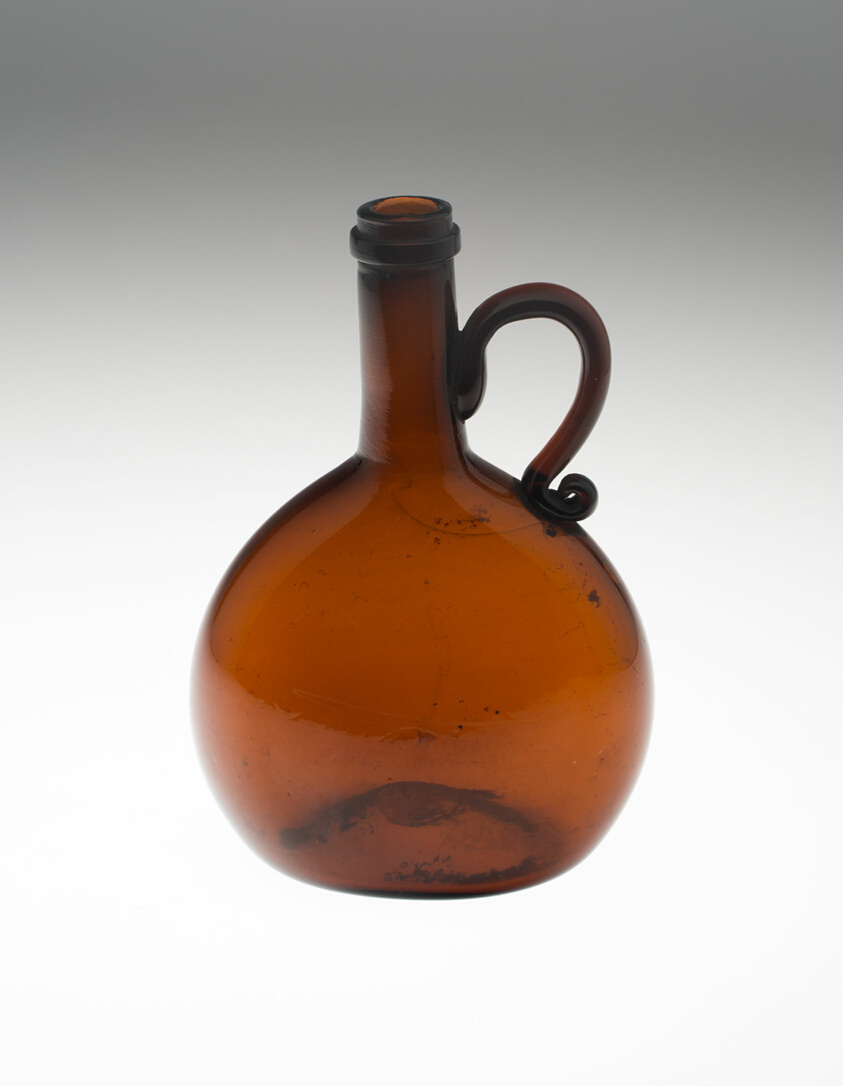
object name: Glass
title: Bottle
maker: Bohemia, Czech Republic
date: c. 1840/50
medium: Amber glass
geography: Bohemia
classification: glass; glass (object genre)